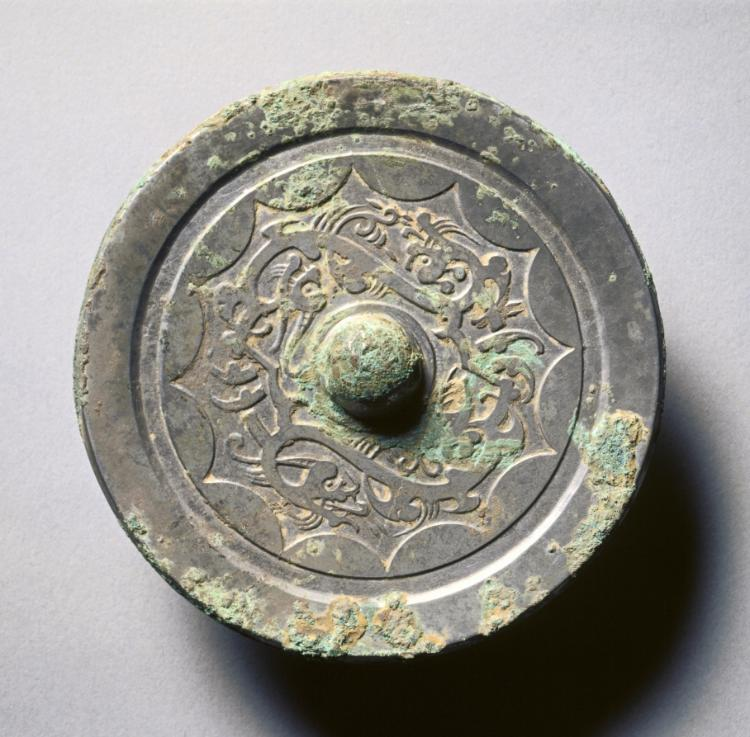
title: Mirror with Linked Arcs and Kui Dragons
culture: China, Eastern Han dynasty (25–220 CE)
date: 200–100 BCE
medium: bronze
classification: Metalwork